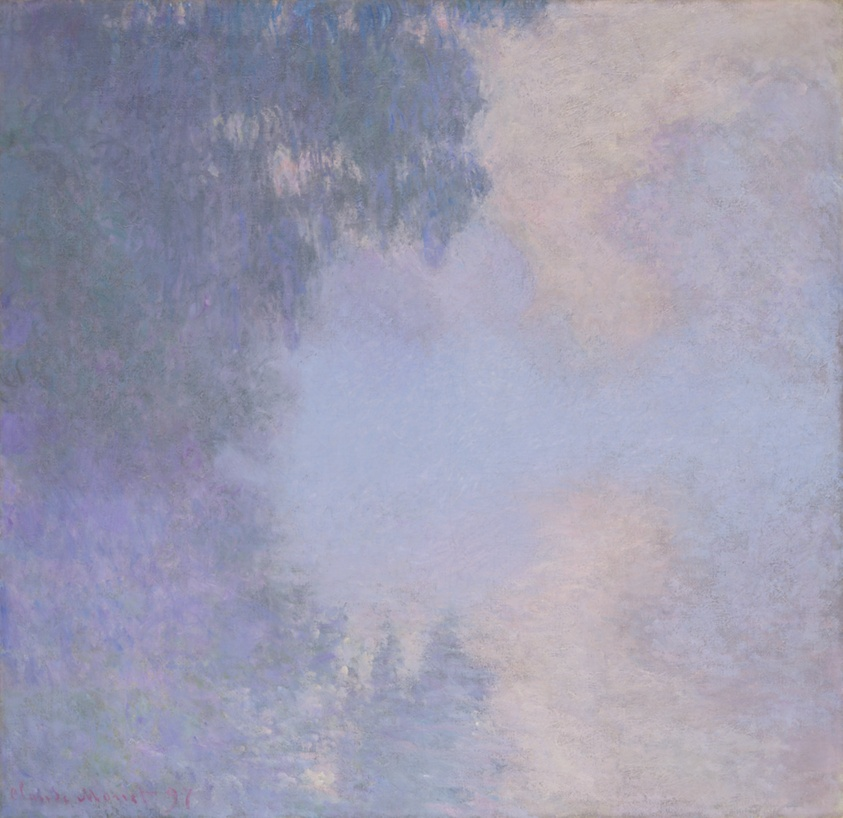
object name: Painting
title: Branch of the Seine near Giverny (Mist)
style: Impressionism, nineteenth century, 19th century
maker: Claude Monet (French, 1840–1926)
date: 1897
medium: Oil on canvas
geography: France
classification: painting; oil on canvas; oil paintings (visual works); paint; french; european painting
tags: landscapes, white (color), river, reflections, purple (color), blue (color), weather/seasons, water